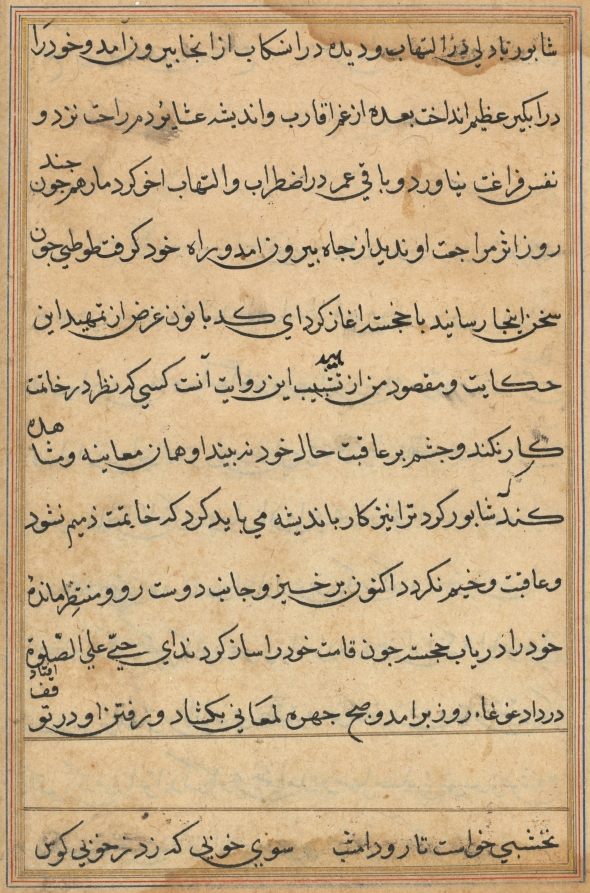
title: Page from Tales of a Parrot (Tuti-nama): text page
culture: Mughal India, court of Akbar (reigned 1556–1605)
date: c. 1560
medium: gum tempera, ink, and gold on paper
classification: Painting